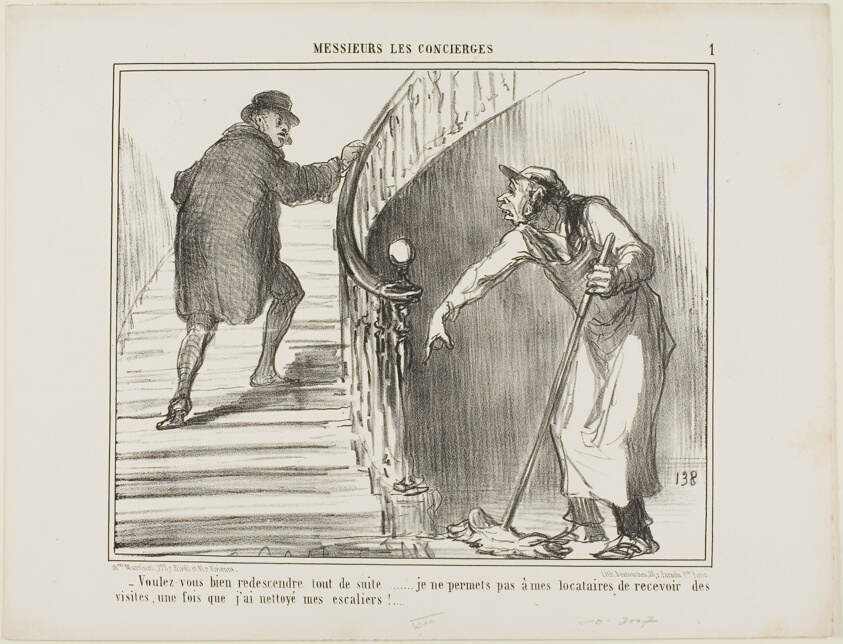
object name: Print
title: “- Would you please come back immediately... I do not allow my tenants to receive visitors once I have cleaned the staircase,” plate 1 from Messieurs Les Concierges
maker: Honoré Victorin Daumier; French, 1808-1879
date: 1858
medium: Lithograph in black on white wove paper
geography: France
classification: lithograph; print; prints and drawing